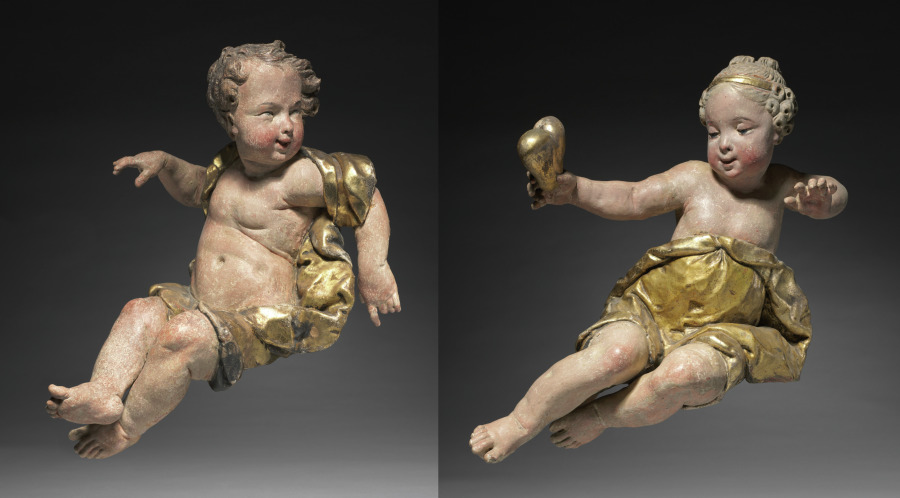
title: Putti Pair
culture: Germany, near Bamberg, 18th century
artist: Ferdinand Tietz (Austrian, 1708–1777)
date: mid-1700s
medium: painted and gilded wood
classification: Sculpture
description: These airborne cherubs probably formed part of the decorations crowning an church altar. One of the putti holds a heart, which would originally have included a flame (now lost). An expression of religious fervor, the burning heart also referenced the Sacred Heart of Jesus, which in Christian imagery symbolized Christ’s love for humanity.